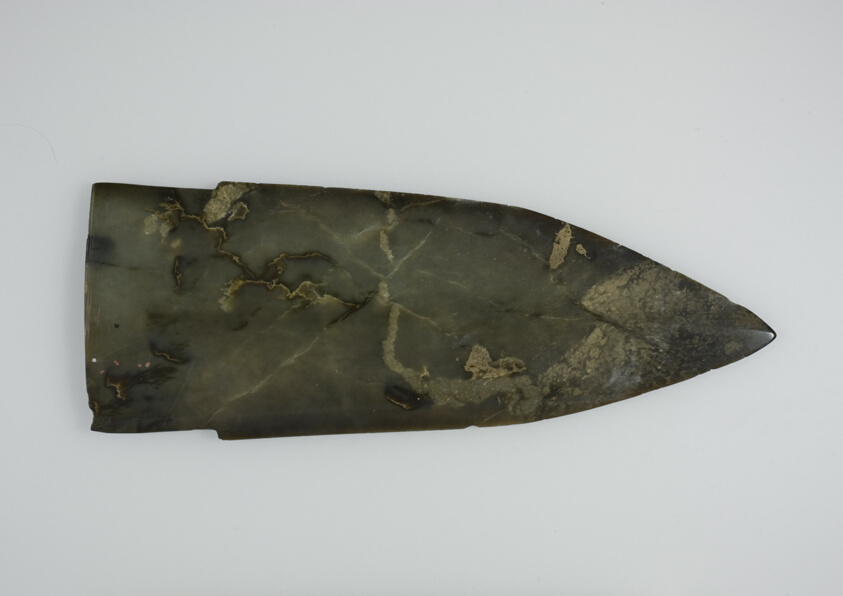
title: Dagger Axe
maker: China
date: Shang dynasty (c. 1600–c. 1046 B.C.)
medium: Jade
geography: China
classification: jade; asian art